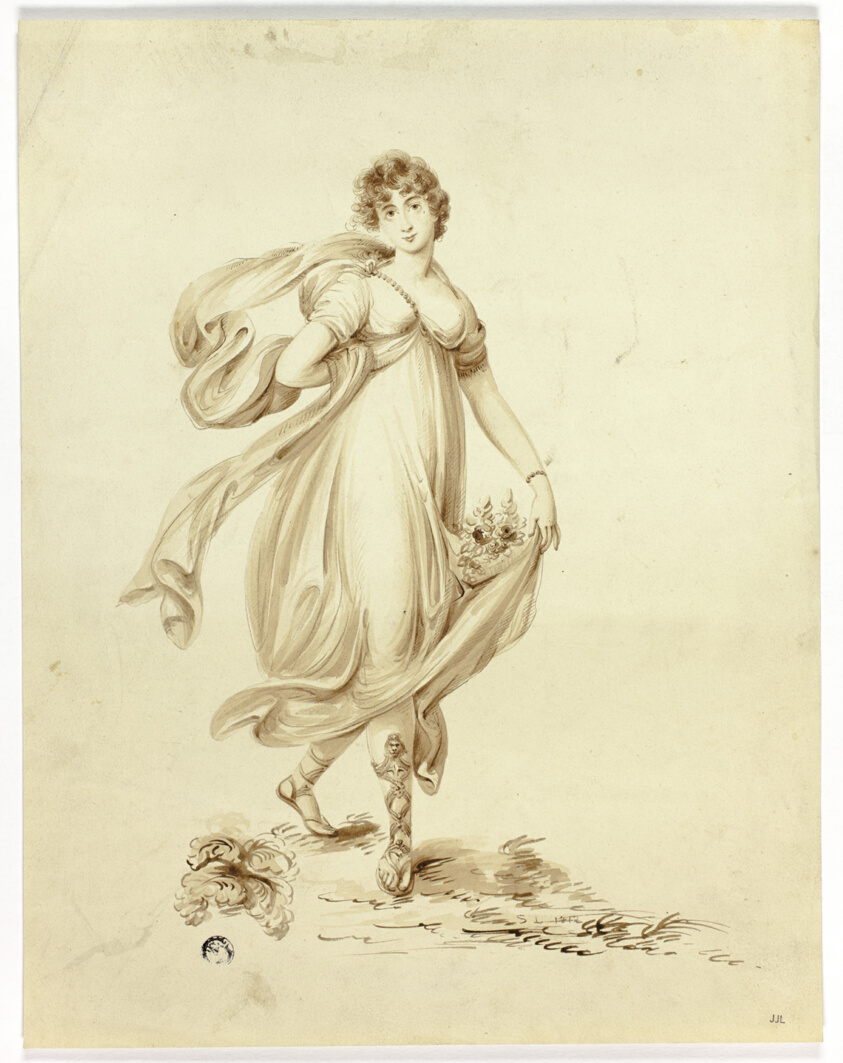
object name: Drawing and Watercolor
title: Young Woman Bearing Flowers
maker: Attributed to Samuel Lane; English, 1780-1859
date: 1812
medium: Pen and brown ink and brush and brown wash, over graphite, on cream wove paper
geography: England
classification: ink or chalk wash; drawings (visual works); prints and drawing